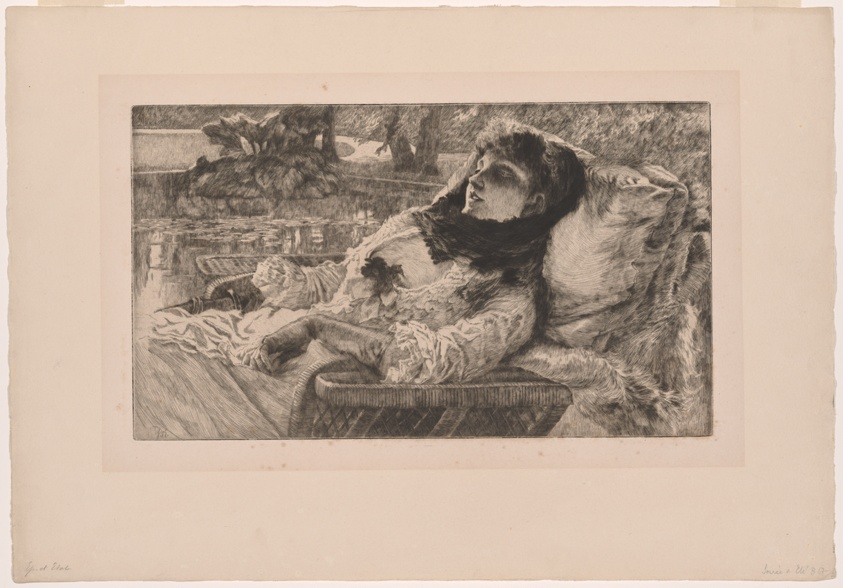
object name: Print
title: Summer Evening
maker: James Tissot (French, 1836-1902)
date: 1881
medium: Drypoint in black on cream wove paper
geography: France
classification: print; prints and drawing; etching; paper